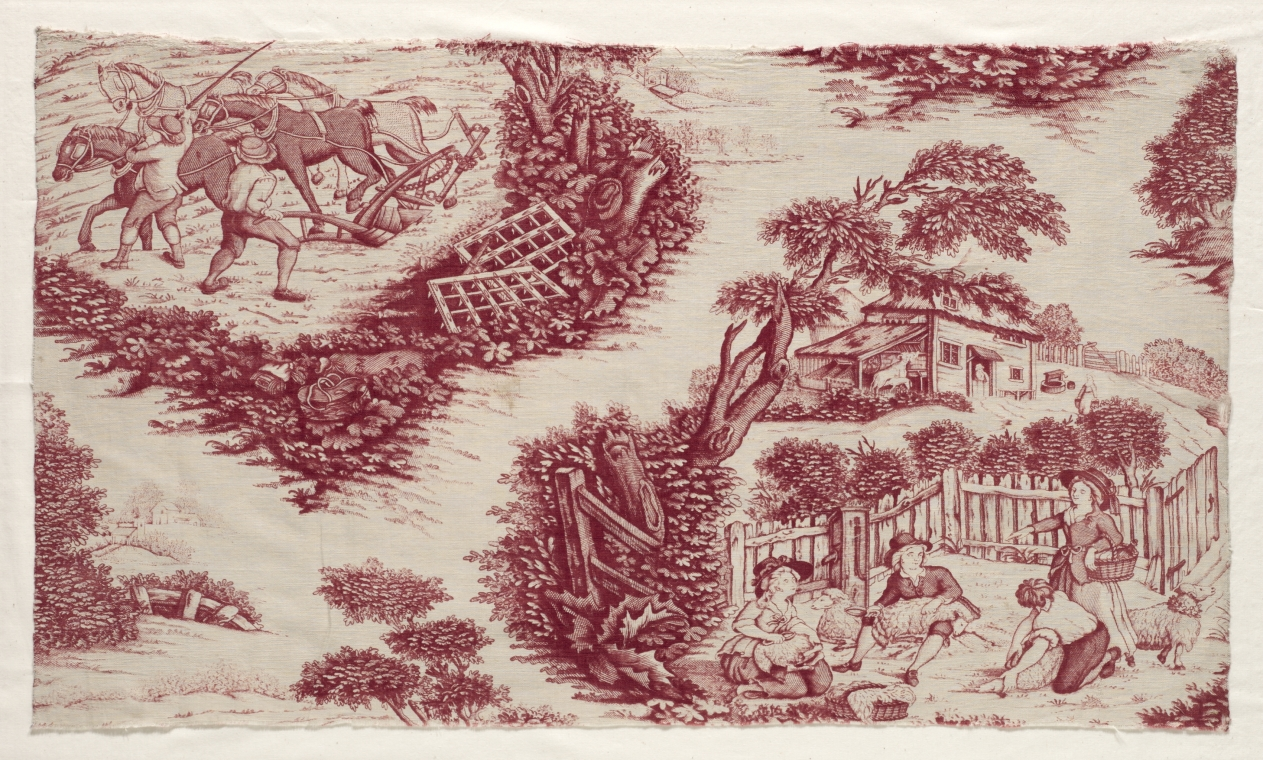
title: Fragment of Printed Cotton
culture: England, late 18th century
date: c. 1785 – 1790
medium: copperplate printed cotton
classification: Textile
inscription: on the bag below the plough scene: "CM / M."